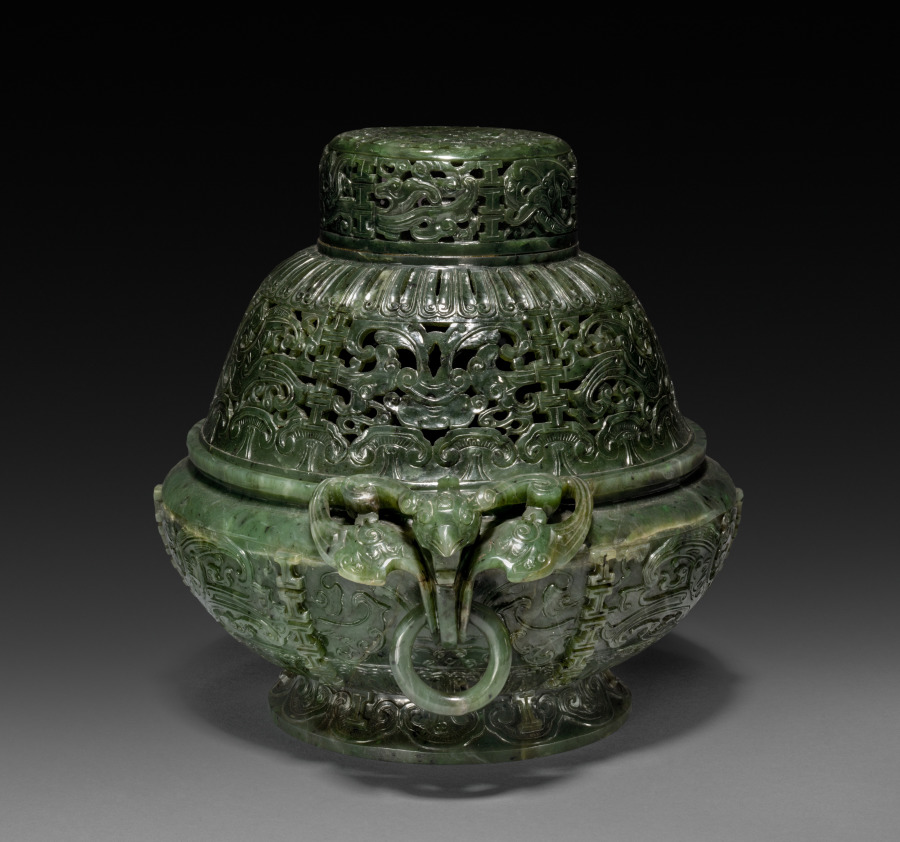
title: Koro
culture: China, Qing dynasty (1644–1911), Qianlong reign (1736–95)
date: 1736–95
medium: jade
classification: Jade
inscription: Qianglong mark on base